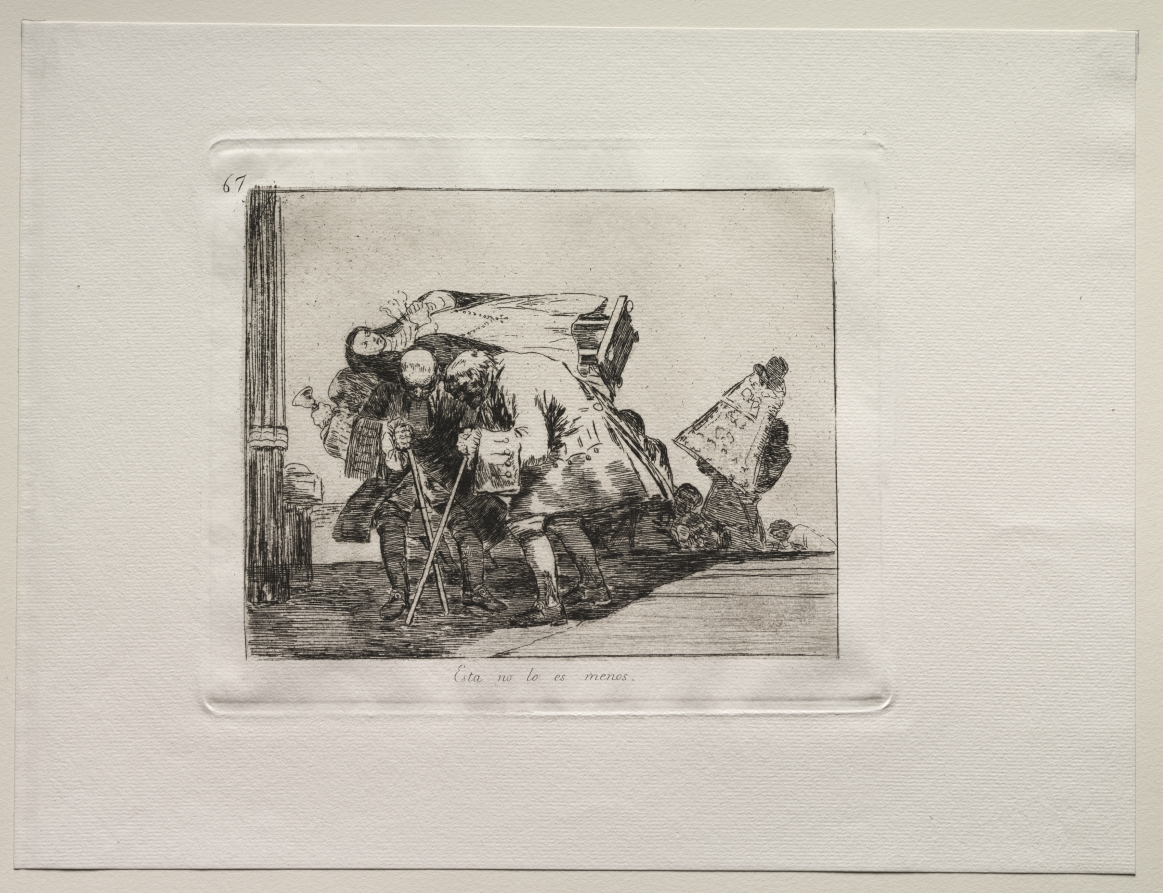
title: The Horrors of War: This Is Not Less So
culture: Spain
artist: Francisco de Goya (Spanish, 1746–1828)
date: c. 1810–20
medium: etching and aquatint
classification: Print